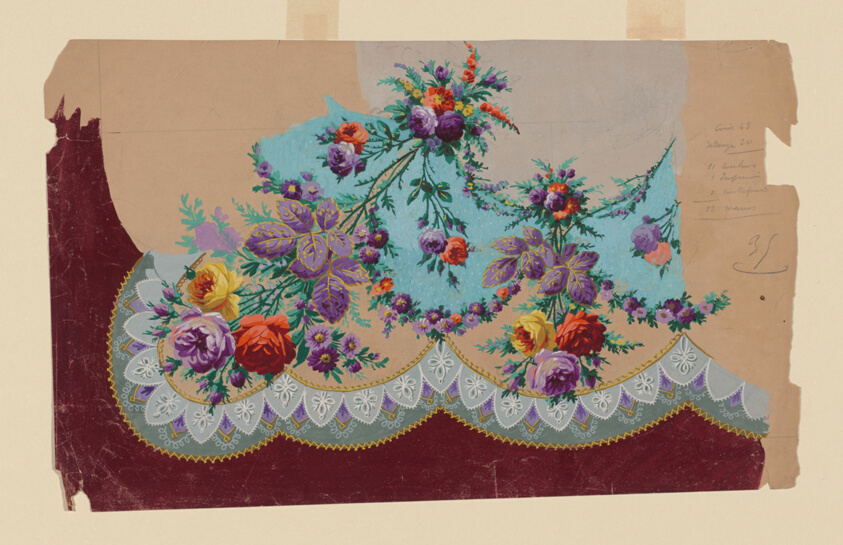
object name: Textile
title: Design for a Printed, Woven, or Embroidered Skirt Border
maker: France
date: 19th century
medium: Design on paper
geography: France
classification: textile; accessory - paper design; accessories (object genre)